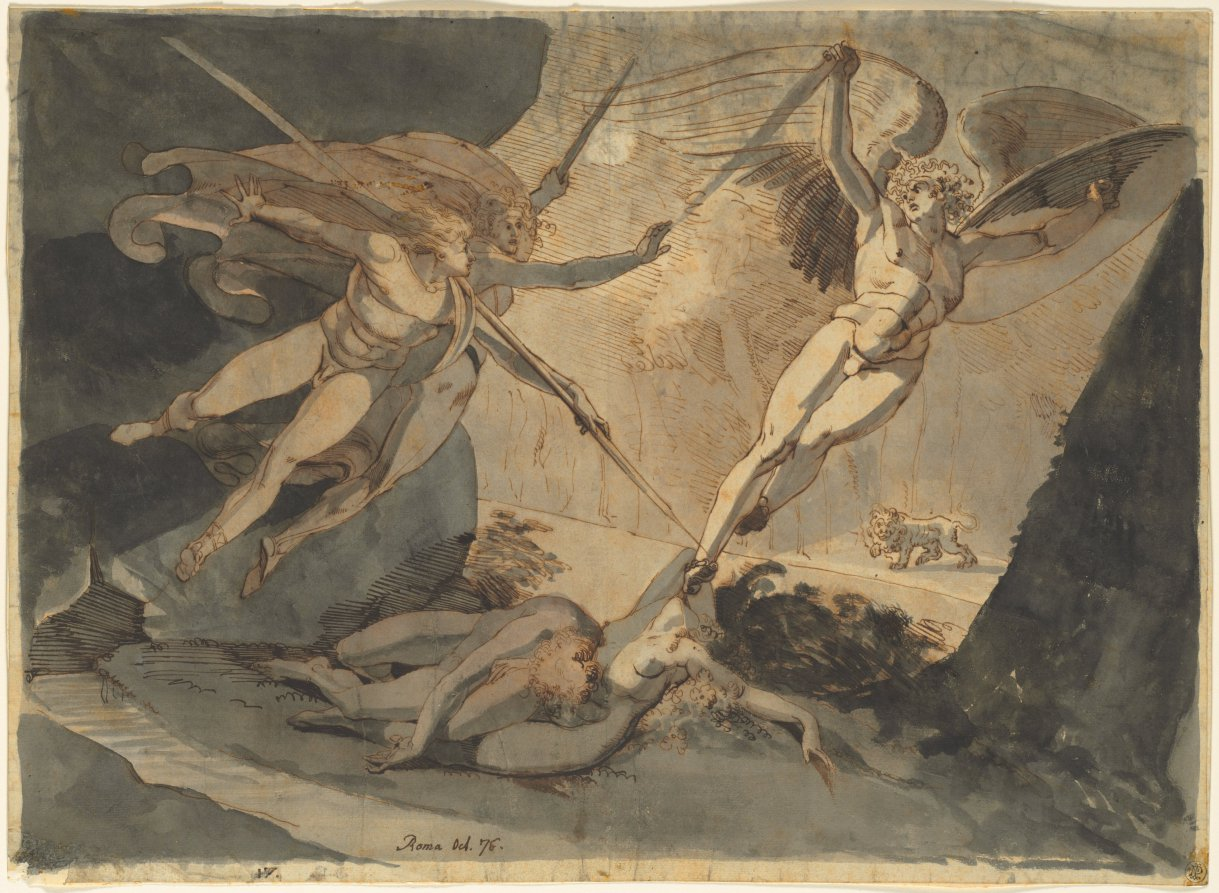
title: Satan Starts from the Touch of Ithuriel's Spear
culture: England, 18th century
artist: Henry Fuseli (Swiss, 1741–1825)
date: 1776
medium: pen and brown ink and brush and gray wash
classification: Drawing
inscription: inscribed, at lower center, in brown ink: Roma Oct. 76; at lower left, in brown ink: 17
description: Henry Fuseli's lifelong interest in the work of the English poet John Milton (1608-1674) inspired many drawings that interpreted passages from Milton's epic poem Paradise Lost (1667). This early example illustrates the moment when the angels Ithuriel and Zephon discover Satan disguised as a toad in the bower where Adam and Eve are sleeping. Ithuriel forces Satan to reveal himself by prodding him with a spear. The lion in the background alludes to an earlier passage in the poem, when Satan takes on the shape of the beast in order to spy on the couple.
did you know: This drawing is one of three almost identical drawings depicting the same scene from Paradise Lost; the other sheets are in the collections of the National Gallery, Stockholm, and the British Museum, London.